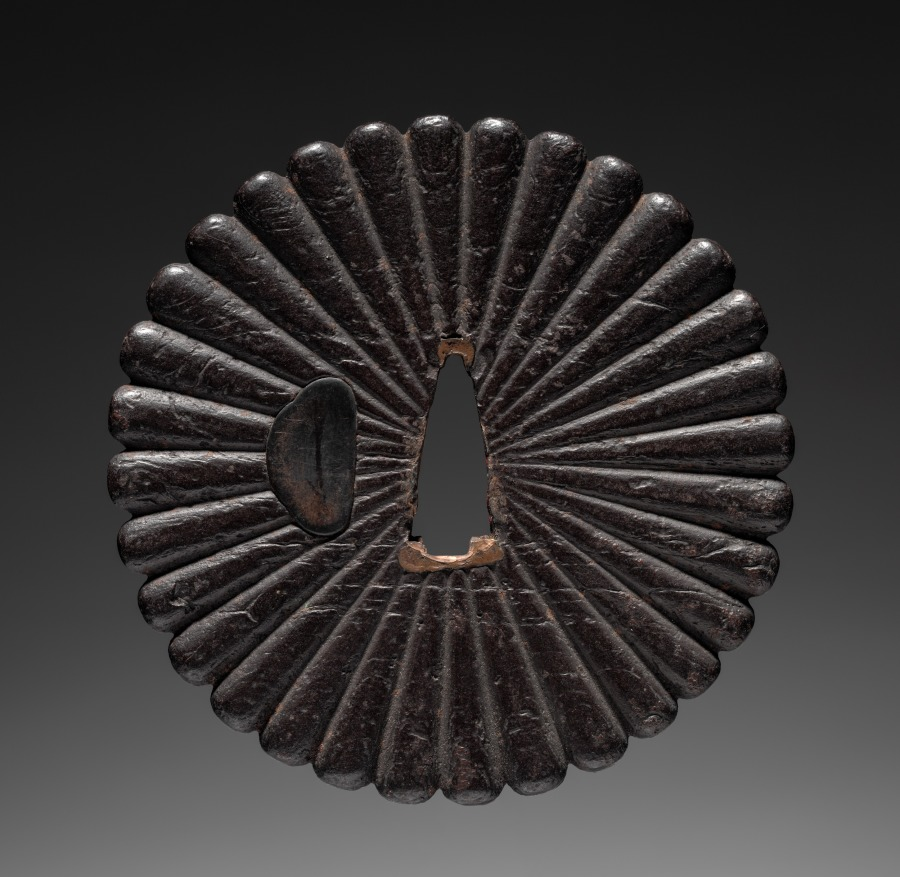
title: Sword Guard (Tsuba)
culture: Japan, possibly Edo period (1615–1868)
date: c. 1615–1868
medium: metal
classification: Arms and Armor